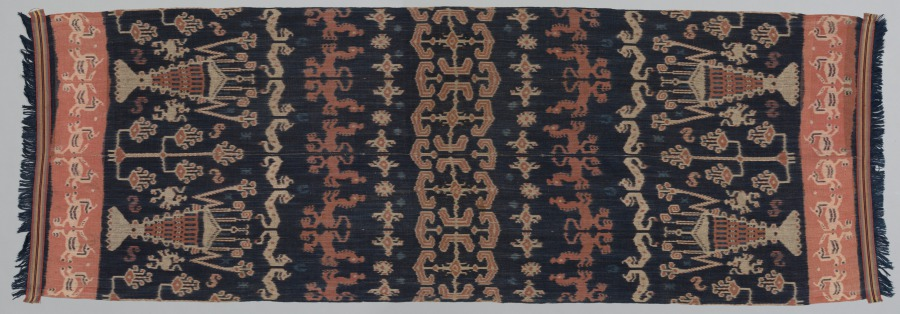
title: Hinggi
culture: Indonesia, Sumba, early 20th century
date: early 1900s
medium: cotton, ikat dyed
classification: Textile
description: Each hinggi consists of two panels stitched together down the center and often, as in this mantle, finished at either end with a band woven with supplementary warps. The geometric motif repeated across the center of this hinggi is a symbol of royalty; the rampant lions, borrowed originally from European coats-of-arms, designate royal power; the large marine shrimp signify longevity, while the Trees of Life between the shrimp symbolize fertility; and the paired deer in red bands at either end are emblems of royal privilege since the hunting of deer was, traditionally, the prerogative of the king.